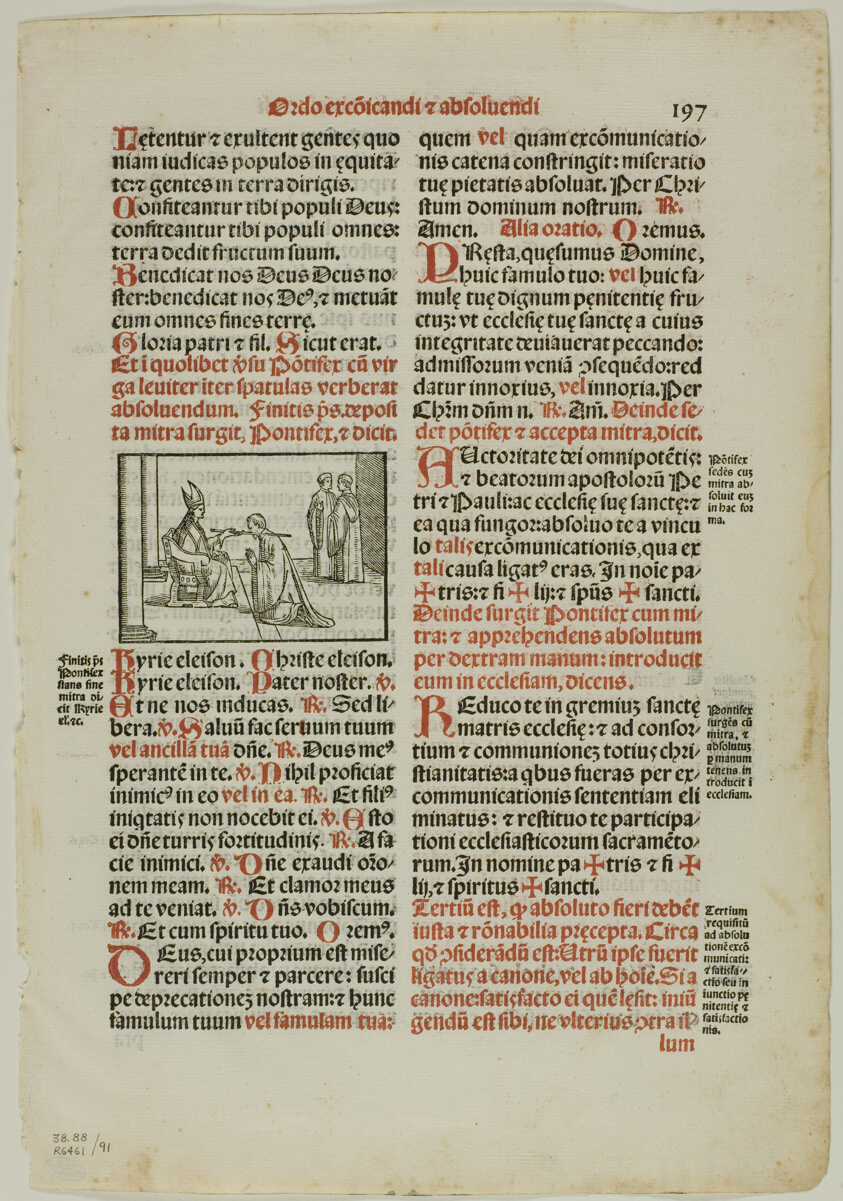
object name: Print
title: Leaf from Pontificale Romanum, plate 91 from Woodcuts from Books of the XVI Century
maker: Unknown Artist (Italian, 16th century); assembled by Max Geisberg (Swiss, 1875-1943)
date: 1572, assembled into portfolio 1937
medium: Woodcut on paper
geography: Italy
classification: woodcut; print; prints and drawing